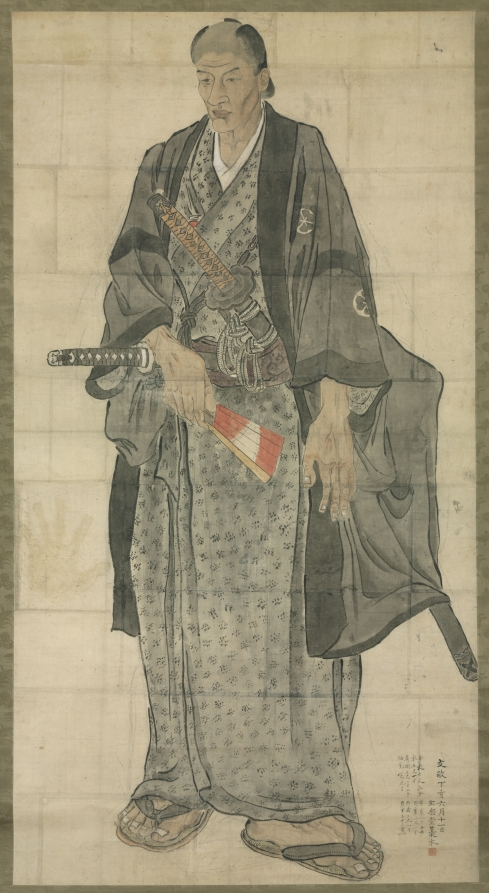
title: Portrait of Ōzora Buzaemon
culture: Japan, Edo period (1615–1868)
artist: Watanabe Kazan (Japanese, 1793–1841)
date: 1827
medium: hanging scroll; ink and color on paper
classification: Painting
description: Over seven feet tall, Ōzora Buzaemon became a tabloid sensation when he arrived in Edo (Tokyo) in 1827 . His handprints were cherished souvenirs, and his image was sold on woodblock prints. As inscriptions on the scroll detail, Watanabe Kazan met Buzaemon at the residence of a noted Confucian scholar. Using a camera obscura–type device—a tool that uses light to project an image onto a surface—he made this preliminary drawing for a painting. The portrayal depicts Buzaemon’s discomfort in being stared at.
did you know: Watanabe Kazan was interested in Rangaku (Dutch Learning).